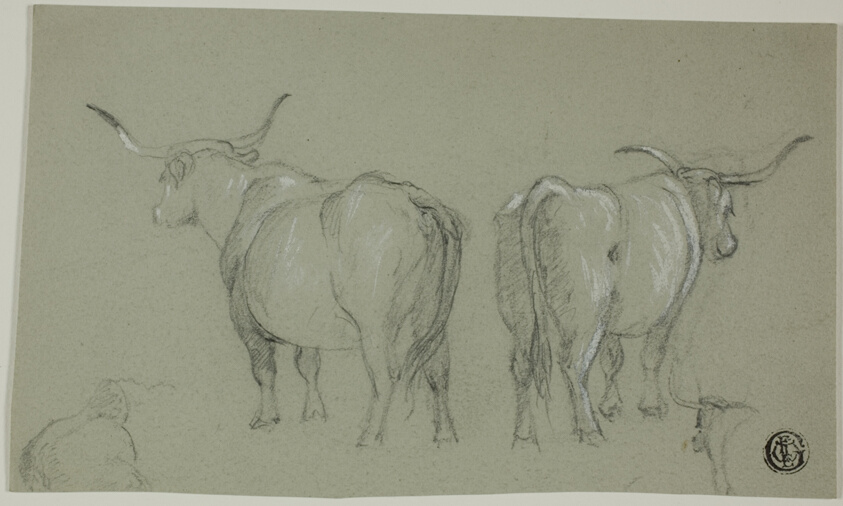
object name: Drawing and Watercolor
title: Sketches of White Cattle from the Maremma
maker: Unknown Artist; Italian, 19th century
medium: Black chalk, with graphite, heightened with white gouache, on pale green wove paper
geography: Italy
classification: chalk; drawings (visual works); prints and drawing